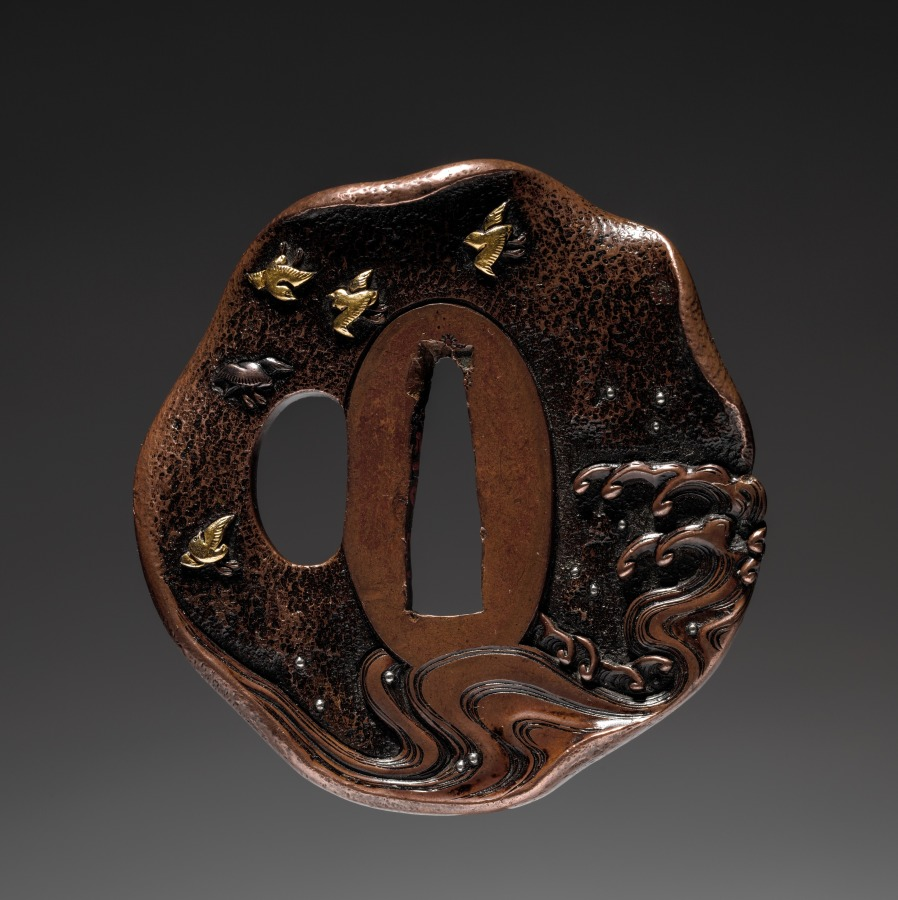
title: Sword Guard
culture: Japan, Edo period (1615–1868)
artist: Nishikawa Yoshikatsu (Japanese)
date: early 1800s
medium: bronze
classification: Arms and Armor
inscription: Signature: Nishikawa Yoshikatsu